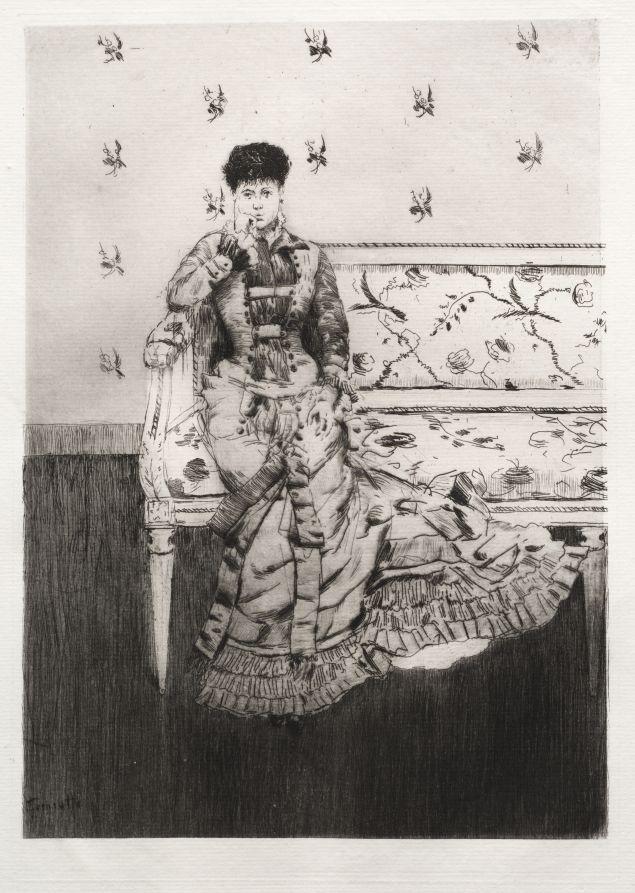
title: Fancy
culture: France, 19th century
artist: Norbert Goeneutte (French, 1854–1894)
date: 1877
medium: etching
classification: Print